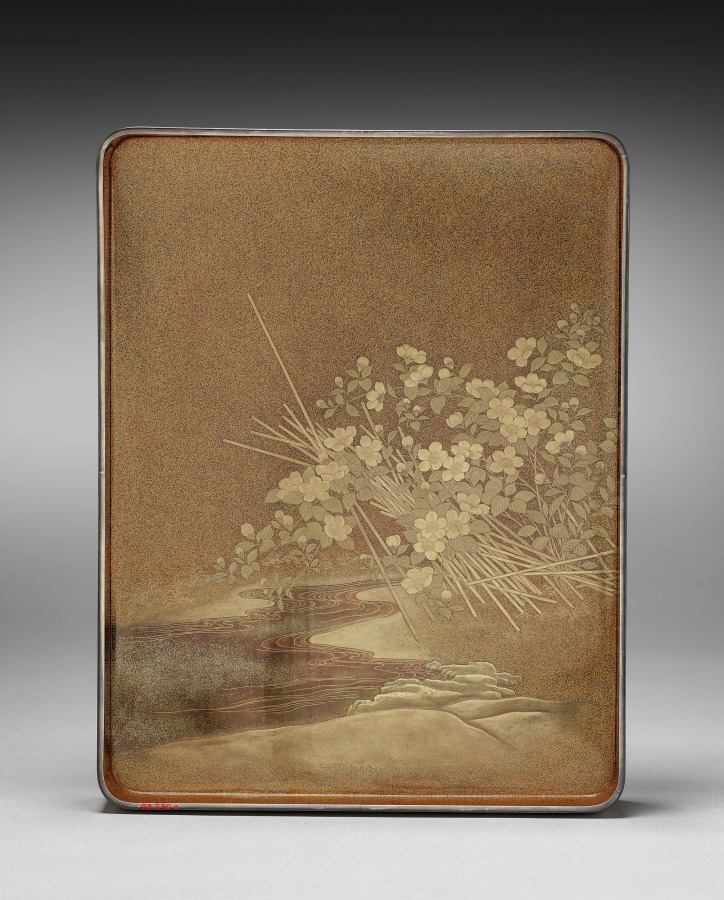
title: Document Box (Ryōshibako) with Chrysanthemum and Plum (lid)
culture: Japan, Meiji period (1868–1912)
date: late 1800s-early 1900s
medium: gold lacquer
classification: Lacquer